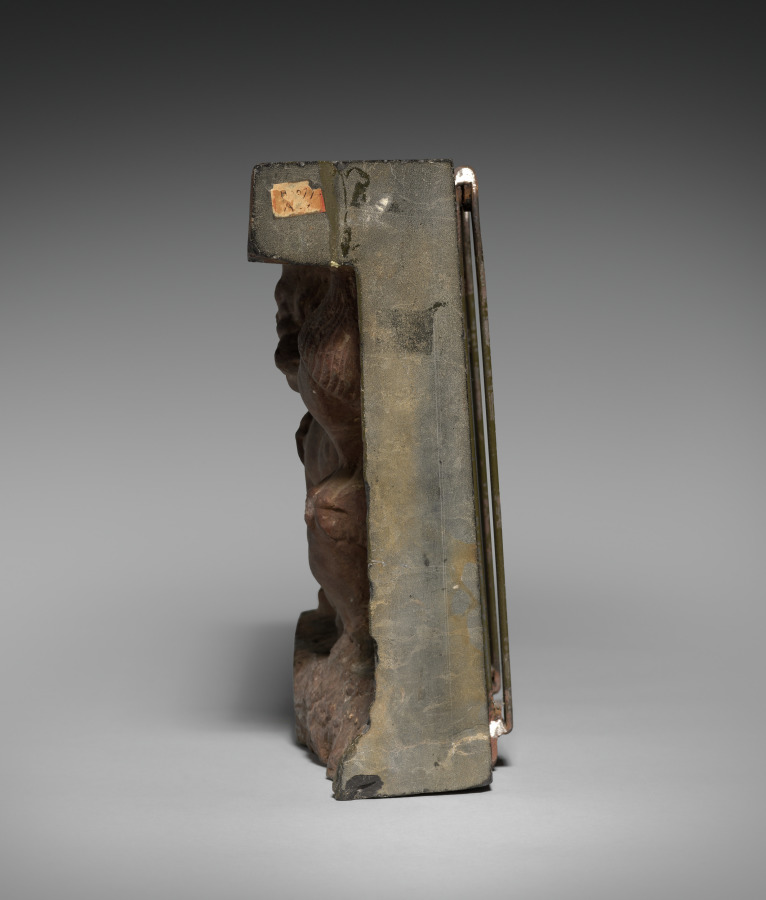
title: Monster Caryatid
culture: China, possibly from Xiangtangshan, Northern Qi dynasty (550–577)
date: late 500s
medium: Limestone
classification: Sculpture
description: This squatting monster with claws on its knees, braces its shoulders against an overhanging molding. The half-human, half-animal creature was likely part of a Buddhist cave-temple complex at Xiangtangshan, in Hebei Province, northwest China. Found in the lower registers of stone monuments of either architectural structures or statues of Buddhist deities, such monsters had a supportive function. Their scary appearance was believed to keep evil spirits away from the sacred sites.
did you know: The complex of Buddhist cave temples at Xiangtangshan, “Mountain of Echoing Halls,” is a central achievement of the Northern Qi period.